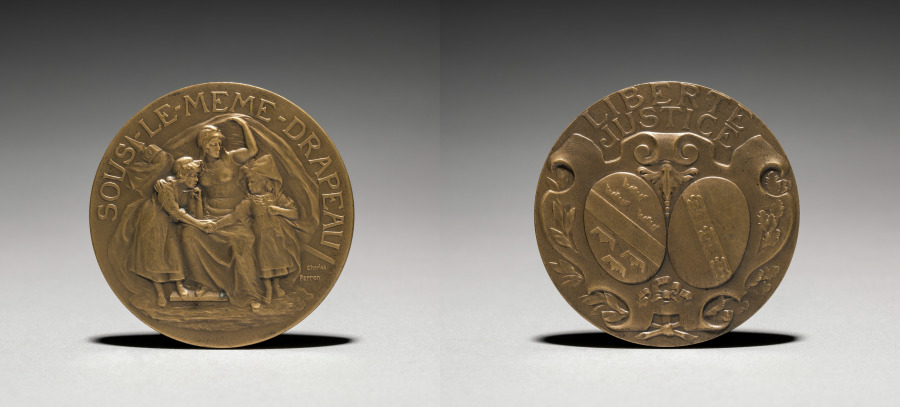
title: Medallion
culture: France, 19th-20th century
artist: Charles-Theodore Perron (French, 1862–1934)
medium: bronze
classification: Metalwork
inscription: "SOUS LE MEME DRAPEAU" (Under the Same Flag); signed: "Charles Perron."